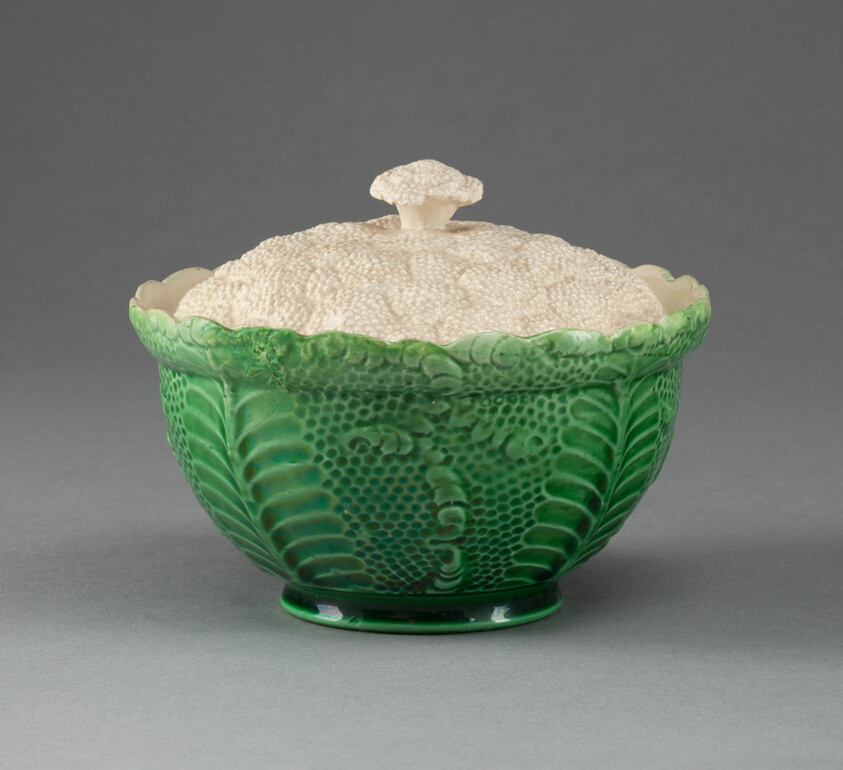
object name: Ceramics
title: Sugar Bowl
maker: Staffordshire, England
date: 1765/80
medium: Lead-glazed earthenware (creamware)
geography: Staffordshire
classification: sugar bowl; teaware; ceramics; creamware; lead-glazed earthenware; european decorative arts; earthenware